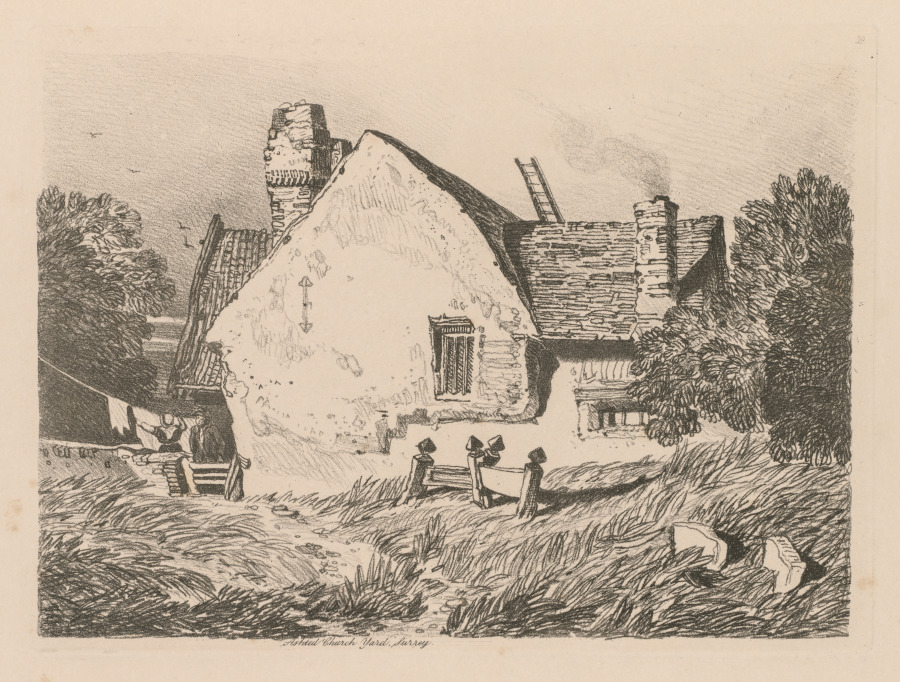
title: Liber Studiorum: Plate 39, View at Ashdted, Surrey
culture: England, 19th century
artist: John Sell Cotman (British, 1782–1842)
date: 1838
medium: softground etching, from a bound volume containing 48 plates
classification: Bound Volume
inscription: In plate, within image, upper right: 39; in plate, below image: Ashted Church Yard, Surrey